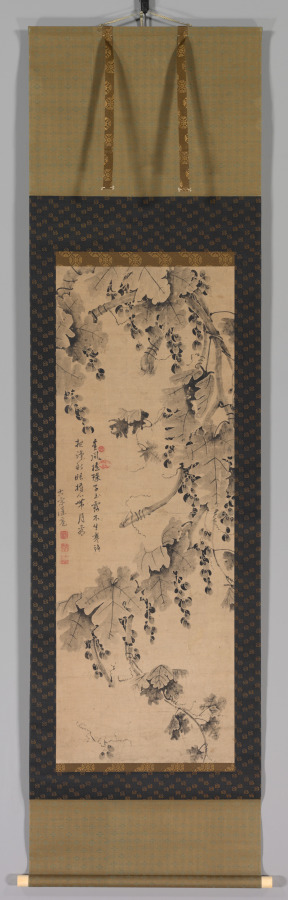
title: Grapevine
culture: China, Qing dynasty (1644–1911)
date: 1700s–1800s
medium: hanging scroll; ink on paper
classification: Painting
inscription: Two-line calligraphic inscription with signature. 5 unidentified seals.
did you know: Clusters of grapes can represent both abundant wealth and numerous offspring.